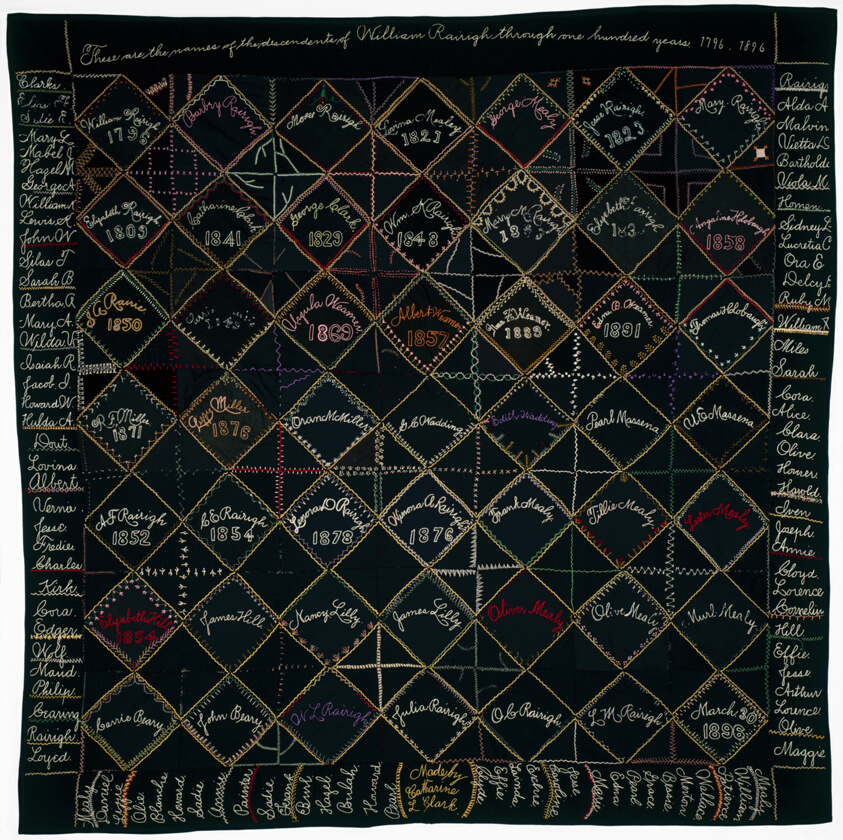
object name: Textile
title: Bedcover Entitled "Genealogy"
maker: Designed and executed by Catharine L. Clark (American, active c. 1896); Cape Cod, Massachusetts, United States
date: 1896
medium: Wool, cotton, and silk, twill weaves and plain weave cut solid velvet, some stamped; pieced; embroidered with silk in back, single back, buttonhole, chain, detached chain, feather, double feather, herringbone, satin, single satin, and stem stitches; backed stitch couching; edged with cotton, plain weave; backed with cotton, satin weave; sewn with cotton thread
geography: Massachusetts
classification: textile; needlework - quilt